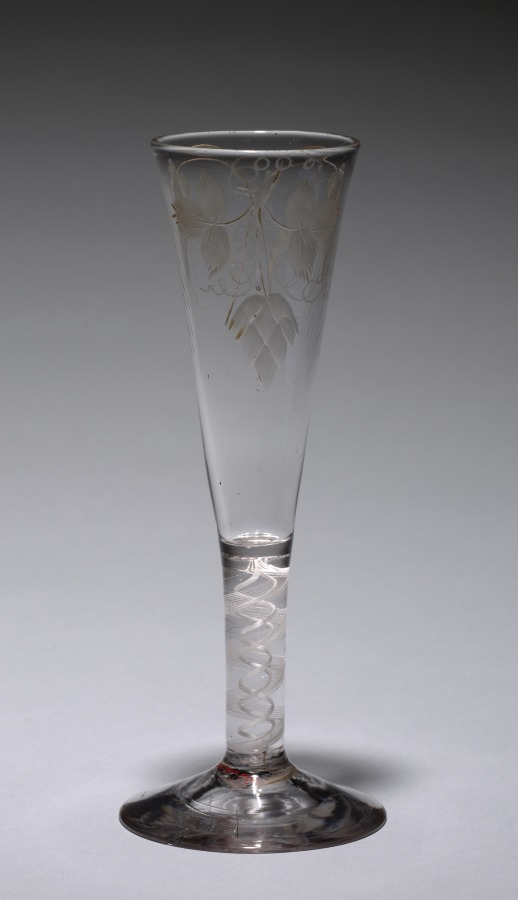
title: Ale Glass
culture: England, 18th century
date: 1750–99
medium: glass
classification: Glass